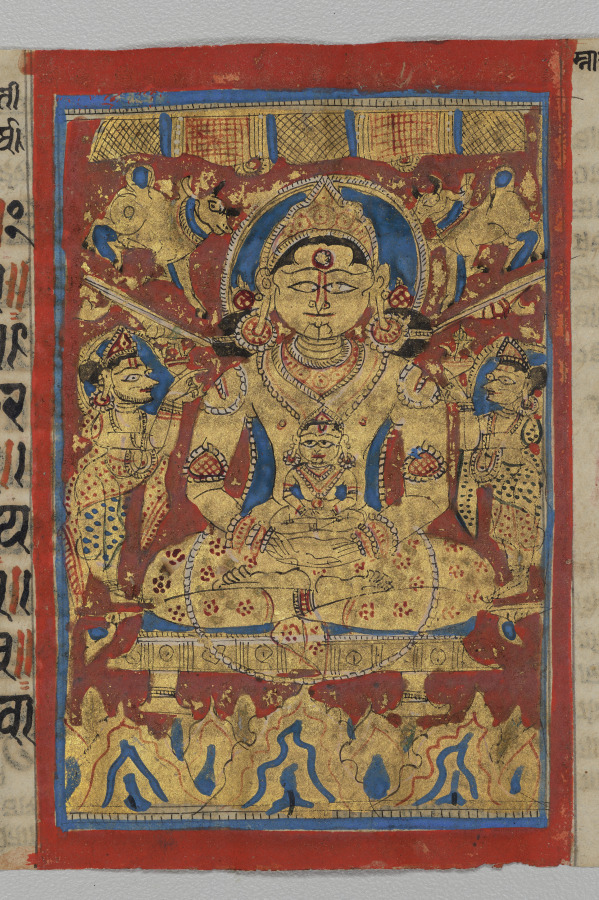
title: Ritual Bath of Mahavira, Folio 31 (recto), from a Kalpa-sutra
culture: Western India, Gujarat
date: c. 1475–1500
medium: Gum tempera, ink, and gold on paper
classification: Painting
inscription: [[upper right]] snātra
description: The large, seated figure in the center of the composition is Indra, king of the gods, who holds in his lap the infant Mahavira, founder of the Jain religion. Indra had taken him to Mount Meru, indicated by the jagged peaks at the bottom of the painting, for his first bath. Two priests flanking them hold vessels for the bath, and the two cows above indicate that the vessels are full of milk. The milk bath washed away all the impurities of the birth.